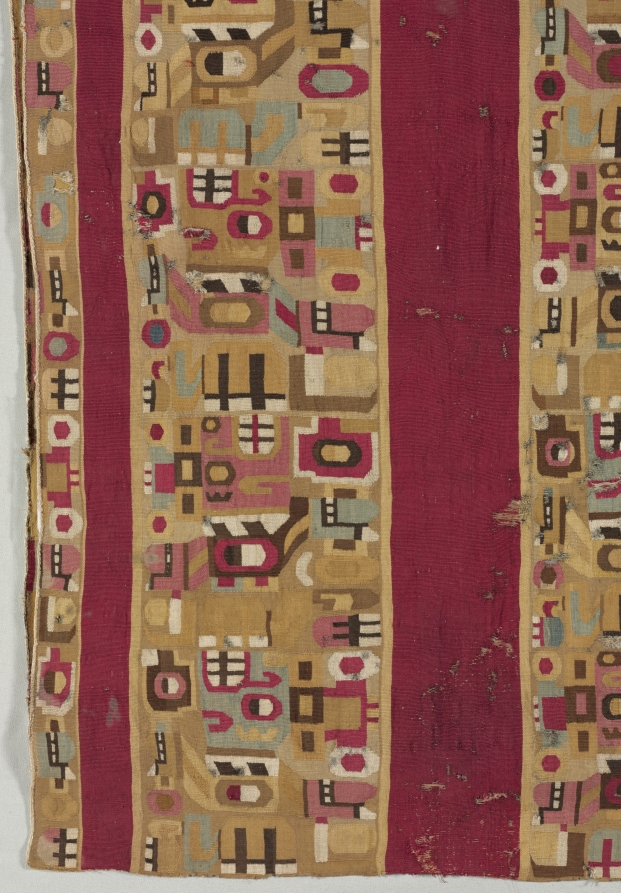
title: Tunic with Sacrificer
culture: South America, Peru, Central Andes, Middle Horizon, Wari people, 7th-11th century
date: 600–1000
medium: camelid-fiber, cotton; tapestry weave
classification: Textile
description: An extremely abstract supernatural sacrifice repeats in different colors and orientations across the body of this tunic, which was shortened on one side in antiquity. Look for the toothy black-and-white mouth in the sacrificer's upward-gazing head; other facial features include a button nose and a vertically divided eye. The figure holds the L-shaped haft of an axe behind its back and, at the front of its body, a short staff with a severed, upside-down human head on the top.